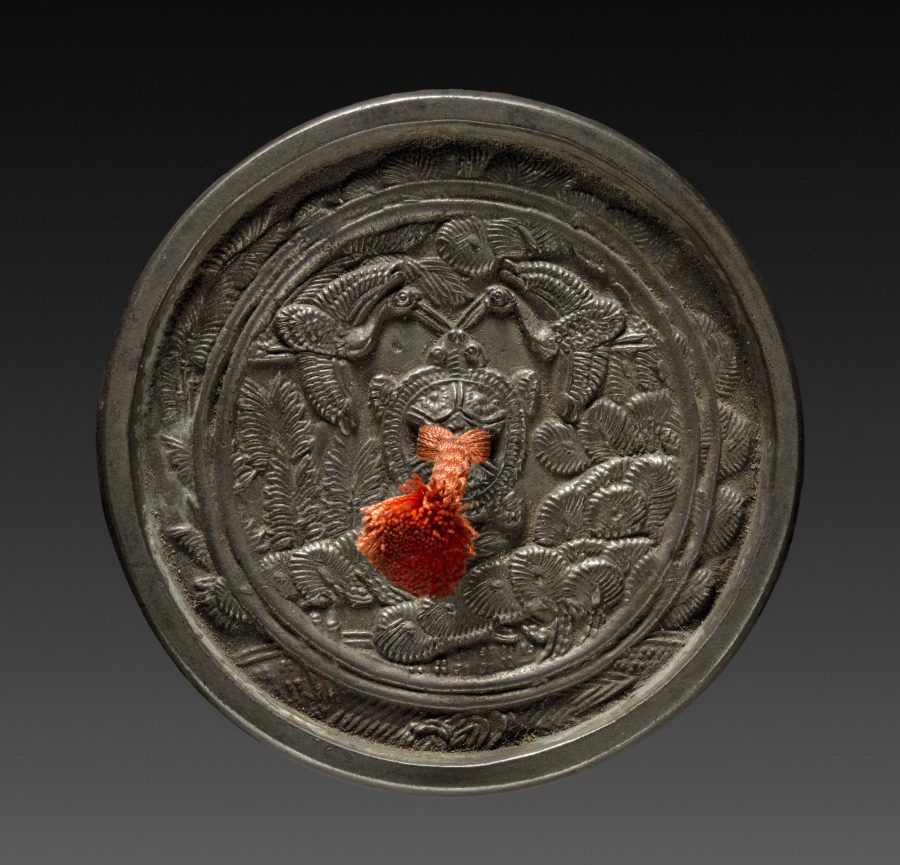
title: Mirror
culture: Japan, Edo period (1615–1868)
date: 1615–1868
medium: bronze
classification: Metalwork